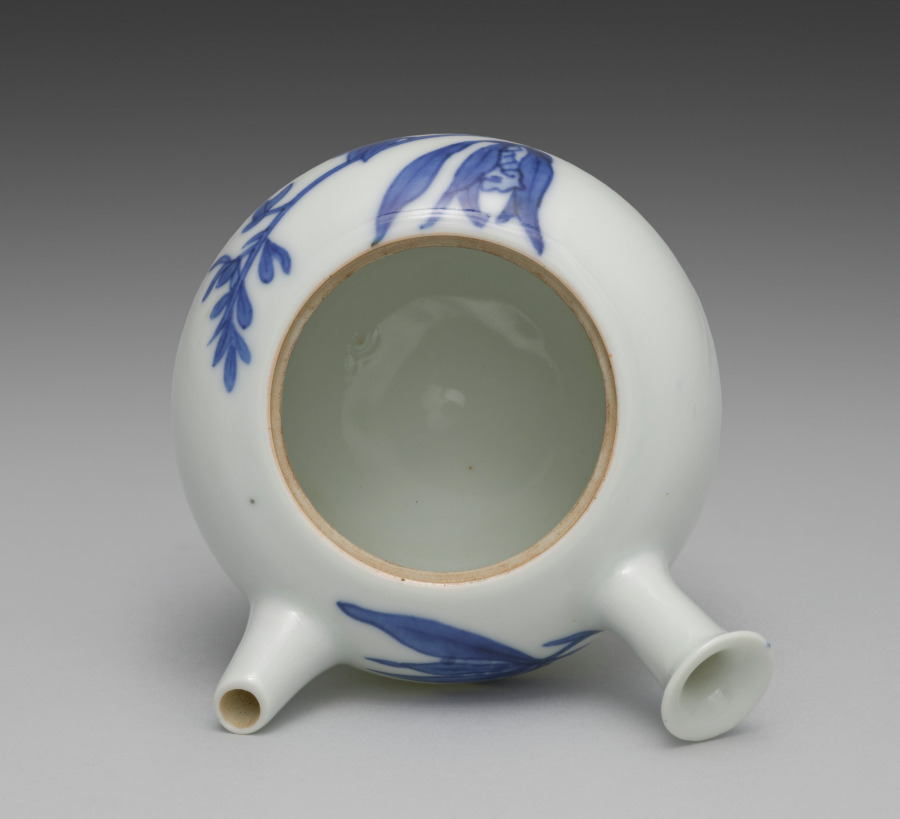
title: Teapot from Tea Set with Orchids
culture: Japan, Meiji period (1868–1912)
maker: Seifū Yohei III (Japanese, 1851–1914)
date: c. 1893–1914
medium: Porcelain with underglaze blue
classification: Ceramic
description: Although the teapot here is stored in a separate box from the five cups, these six pieces may once have been part of a tea set that included other tools such as a water cooler. The teacups have orchid flowers on both sides in underglaze blue, as well as a blue band inside the footring. The teapot has the same design and a blue band painted around the bottom of the lid’s knob. The cups’ long wood storage box is stamped on the exterior, over the lid and base, with a small red seal reading “Satō.” The same seal appears on five small squares of yellow textile, one placed in the bottom of each compartment in the teacup storage box. These are additional to the customary yellow cloths stamped with a “Seifu” seal. Interestingly, four of the Seifū cloths are stamped with an ovoid seal, while the remaining cloth, which is a slightly lighter color, has an unusual seal that is not quite gourd-shaped and with the fū of Seifū in a stylized, unrecognizable form. The teapot has its own box with a Satō seal and is wrapped with an orange textile stamped with the same unusual Seifū seal. A set with a very similar surface design is in the Brooklyn Museum. The Brooklyn set has a water cooler and a small pitcher, in addition to the teapot and cups, and all are in a single storage box. This box records the tea tools as made with kanpakuji, or “bright-jewel white porcelain,” counted among Yohei III’s most important inventions, and carved images. In fact, both sets have a white surface much closer in coloration to the cool white of porcelain clay used in Kyoto at the time, and the designs are simply painted. The Brooklyn set was thus likely mismatched at some point with a box intended for another tea set. Nonetheless, the box may have helped prevent the set’s original components from being dispersed, and the set itself provides insight into how the other tools from the present set may have looked.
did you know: This tea set with orchids has a side-handled pot called a kyūsu, used for steeping, straining, and serving tea.